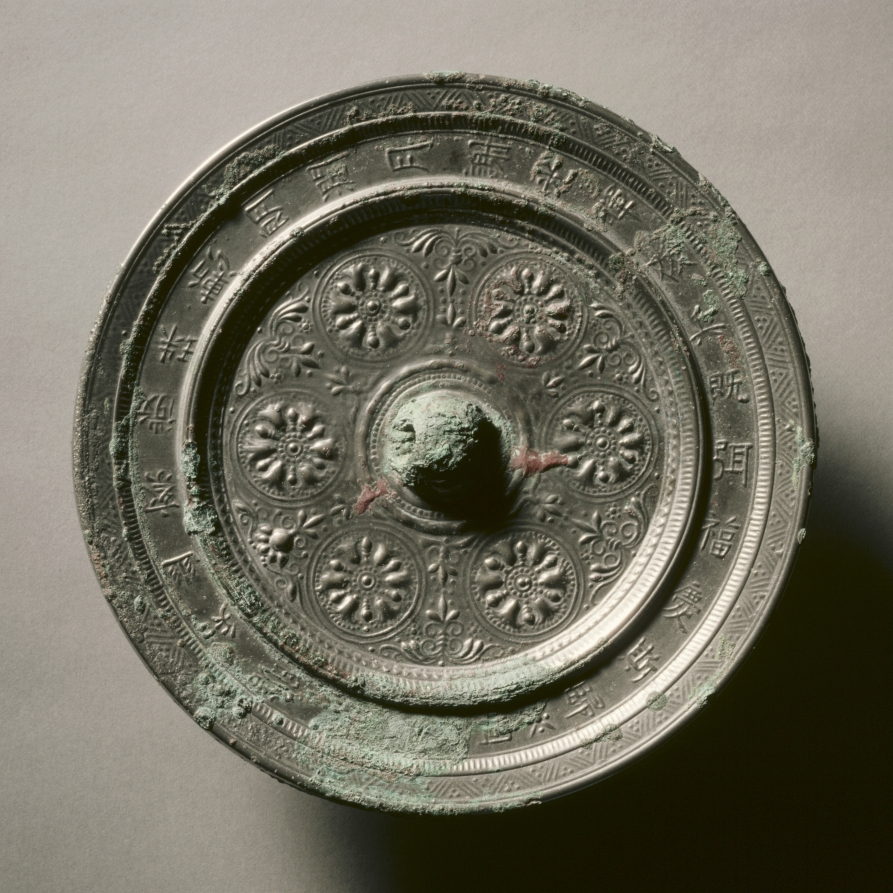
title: Mirror with Six Circular Flowers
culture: China, Tang dynasty (618-907)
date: 600s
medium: bronze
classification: Metalwork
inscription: 【】【】【】膽，知幽察微。珠慚朗潤， 月謝光輝。【】兵既弭，福慶斯歸。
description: Around the mirror’s central knob, there are six floral designs set within circles, separated by candelabra-like dividers. These flower designs later became known as "baoxiang hua 寶相花" or "flowers of precious appearance", which often remind people of Buddhist connections. The design also includes a ribbon of inscription, praising the mirror’s clarity and celebrating the end of a war.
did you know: This mirror was made to commemorate the end of a war.